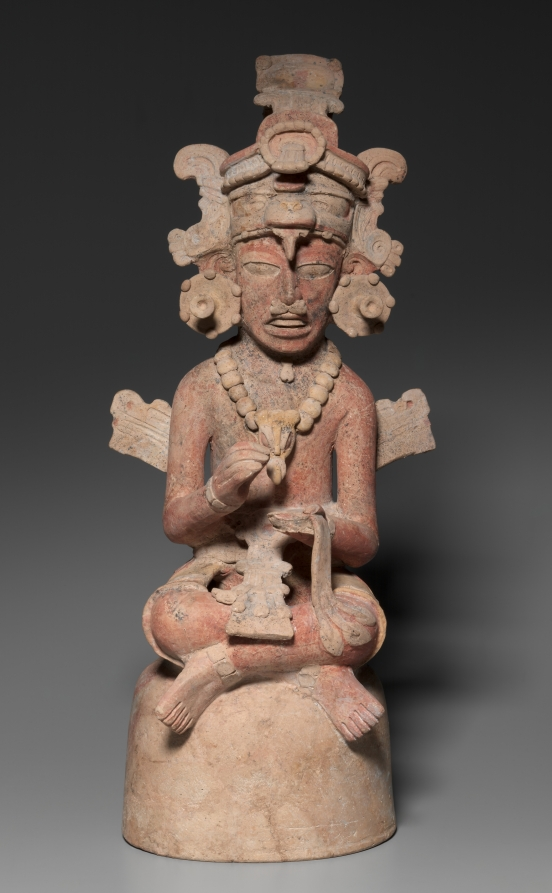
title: Artisan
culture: Guatemala, Petén region, Maya style (250-900), Maya style (250-900)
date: 250–600 CE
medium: earthenware with colored slips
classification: Sculpture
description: These figures represent the supernatural patrons of the visual arts and writing: the brothers Hun Batz and Hun Chuen ("One Monkey" and "One Artisan"). The two were refined artists but also bullies who tormented their younger brothers, who took revenge by transforming their elders into monkeys. Many Maya representations of the painter-scribes immortalize this fate by depicting the pair with both simian and human features, as here. The brothers are shown engaged in artistic or scribal pursuits. Sitting on high-domed bases that may have served as the lids of incense or offering bowls, each apparently once grasped a tool in his upper hand—for instance, a paint brush or a stylus for writing. In the lower hand, one cradles a small mask and the other, a piece of bark that likely refers to the beaten bark from which the Maya made books.